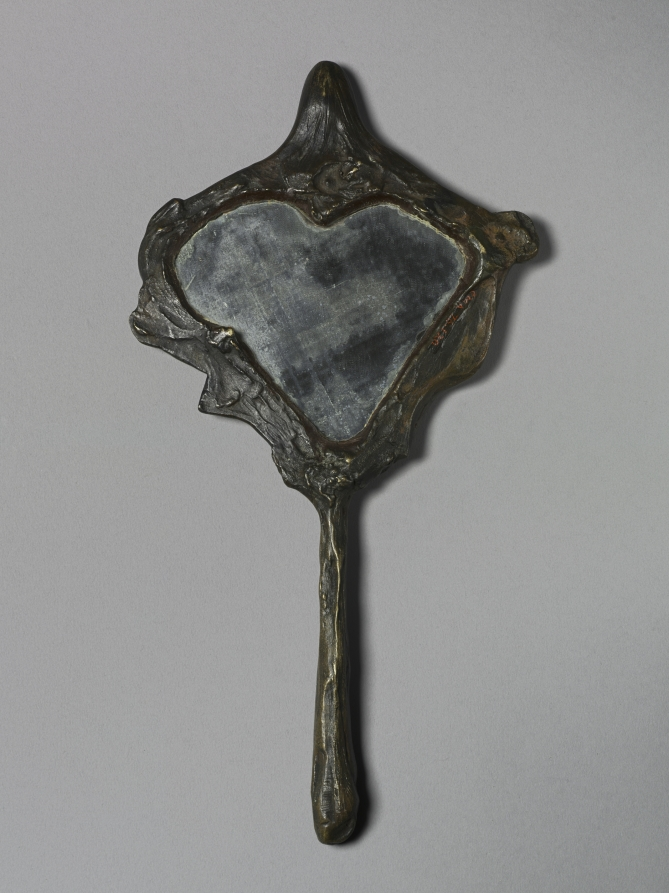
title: Hand Mirror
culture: Finland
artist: Villé Vallgren (Finnish, 1855–1940)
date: c. 1895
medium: bronze and glass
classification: Metalwork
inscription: inscribed lower right: Vallgren.